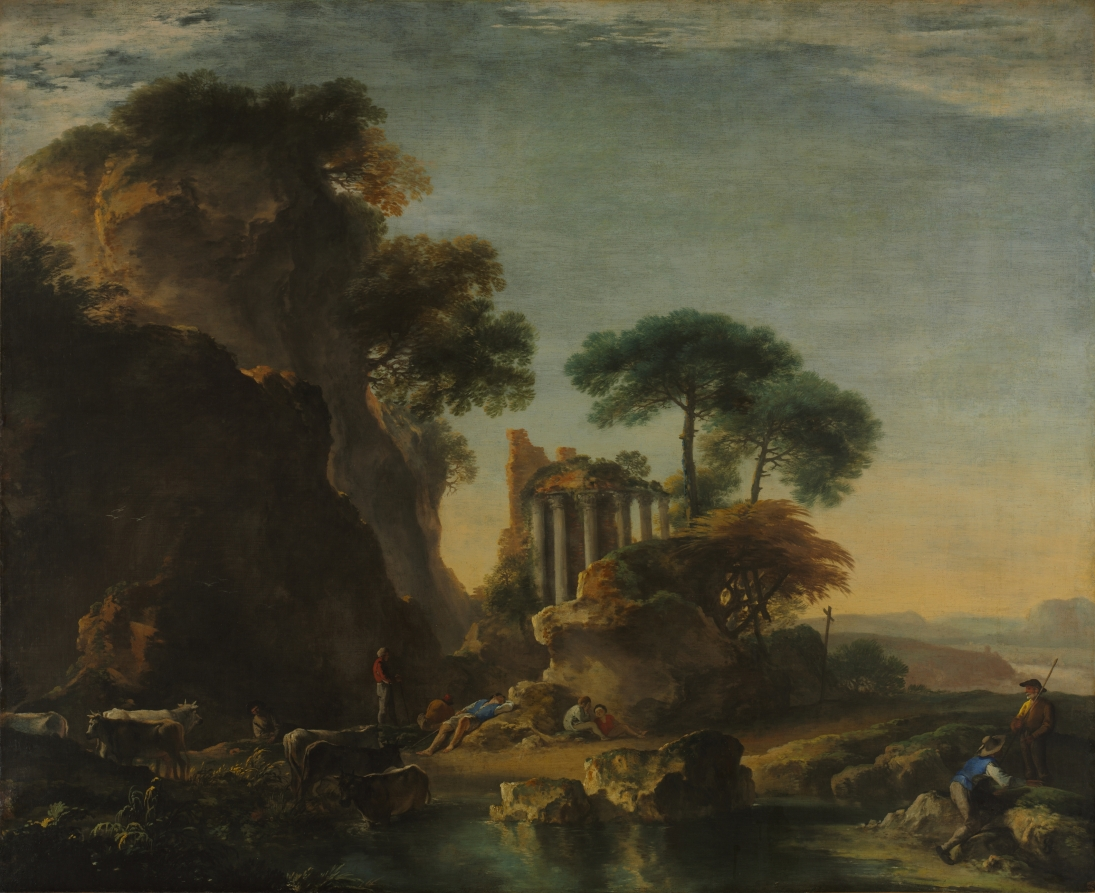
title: Ruins in a Rocky Landscape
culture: Italy, 17th century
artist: Salvator Rosa (Italian, 1615–1673)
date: c. 1640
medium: oil on canvas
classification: Painting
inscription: Signed lower right: "SR [monogram]"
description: In 1635, Rosa left his native Naples for Rome, the undisputed art center of the 17th century, where a new type of landscape painting was emerging, distinguished by the effects of light and atmosphere. Rosa’s fame grew quickly as a painter of landscapes that conjured the beauty and fertility of the Bay of Naples. Ruins in a Rocky Landscape incorporates classical ruins, iridescent reflections of light, and a pastoral tone evoked by the idling shepherds, exemplifying the work that earned Rosa his early fame. The dark, dramatic rocks that rise along the left foreshadow the wildness that Rosa would cultivate in his later sublime landscapes.